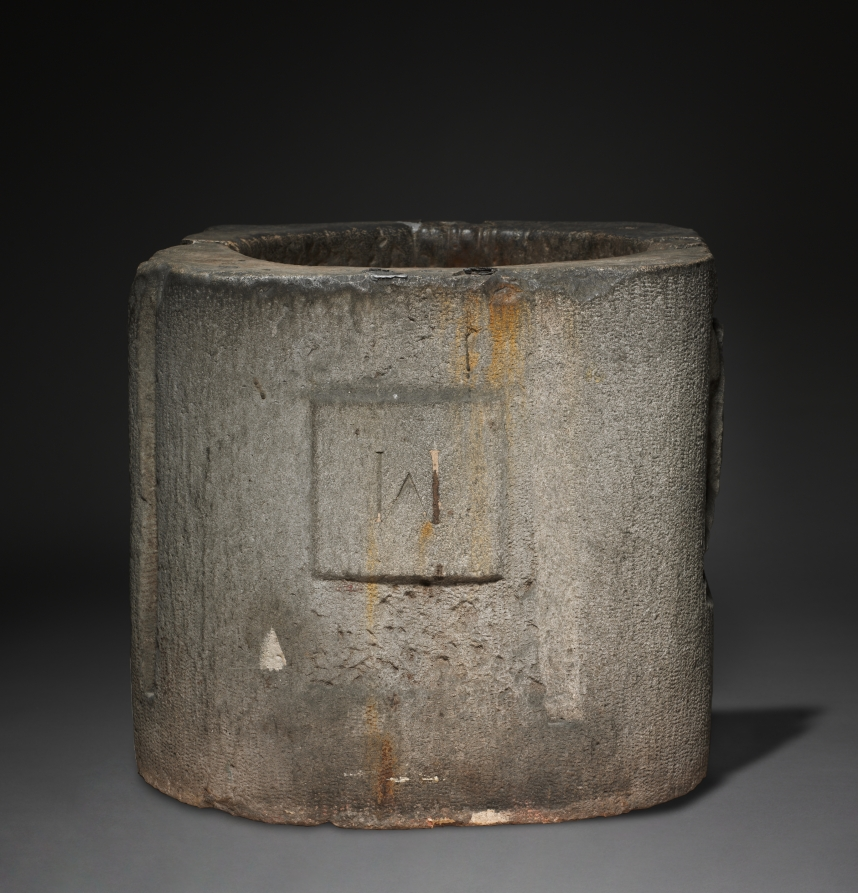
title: Well Head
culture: Lombardic, Italy, Venice(?), Migration period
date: 700s-800s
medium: limestone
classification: Sculpture